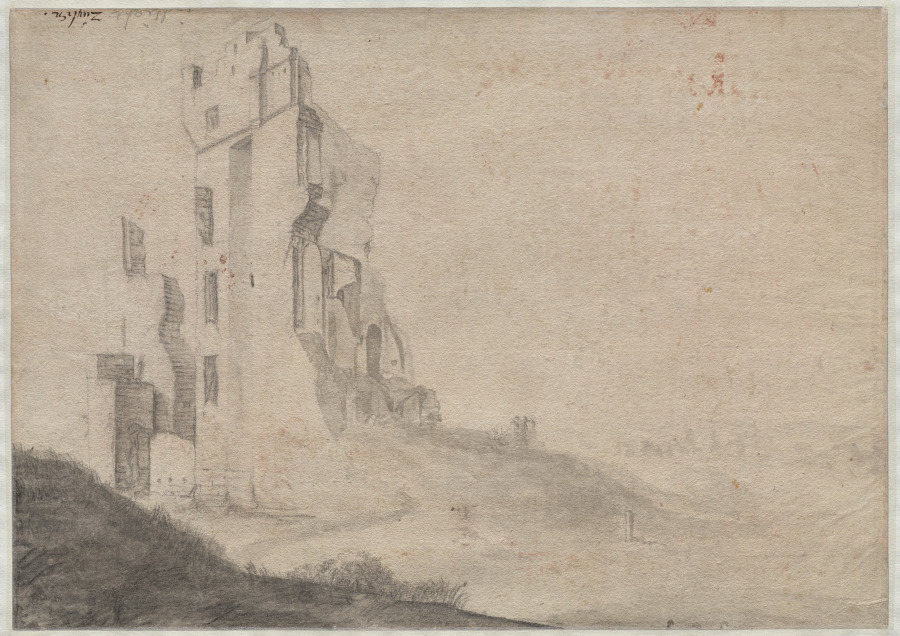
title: Ruin of the huis Ter Kleef near Haarlem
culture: Netherlands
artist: Roelant Roghman (Dutch, 1627–1692)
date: c. 1646–47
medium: black chalk on paper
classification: Drawing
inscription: In black ink, recto, lower left: "R. Roghman (signed)"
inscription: in black ink, recto, lower right: "Zuylen"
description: Zuijlen Castle Near Utrecht by Dutch artist Roelant Roghman is one of more than 200 drawings the artist made featuring castles, manor houses, and fortresses during a tour around the Netherlands. The artist traveled on foot to capture the present state of the buildings after a long and protracted war with Spain. He used large sheets of paper and combined ink wash and charcoal, capturing the buildings on the spot and then embellishing each with landscape elements.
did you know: In the 1640s, the artist Roelant Roghman spent two years traveling by foot and drawing manor houses, fortresses, and civic buildings throughout the Netherlands.